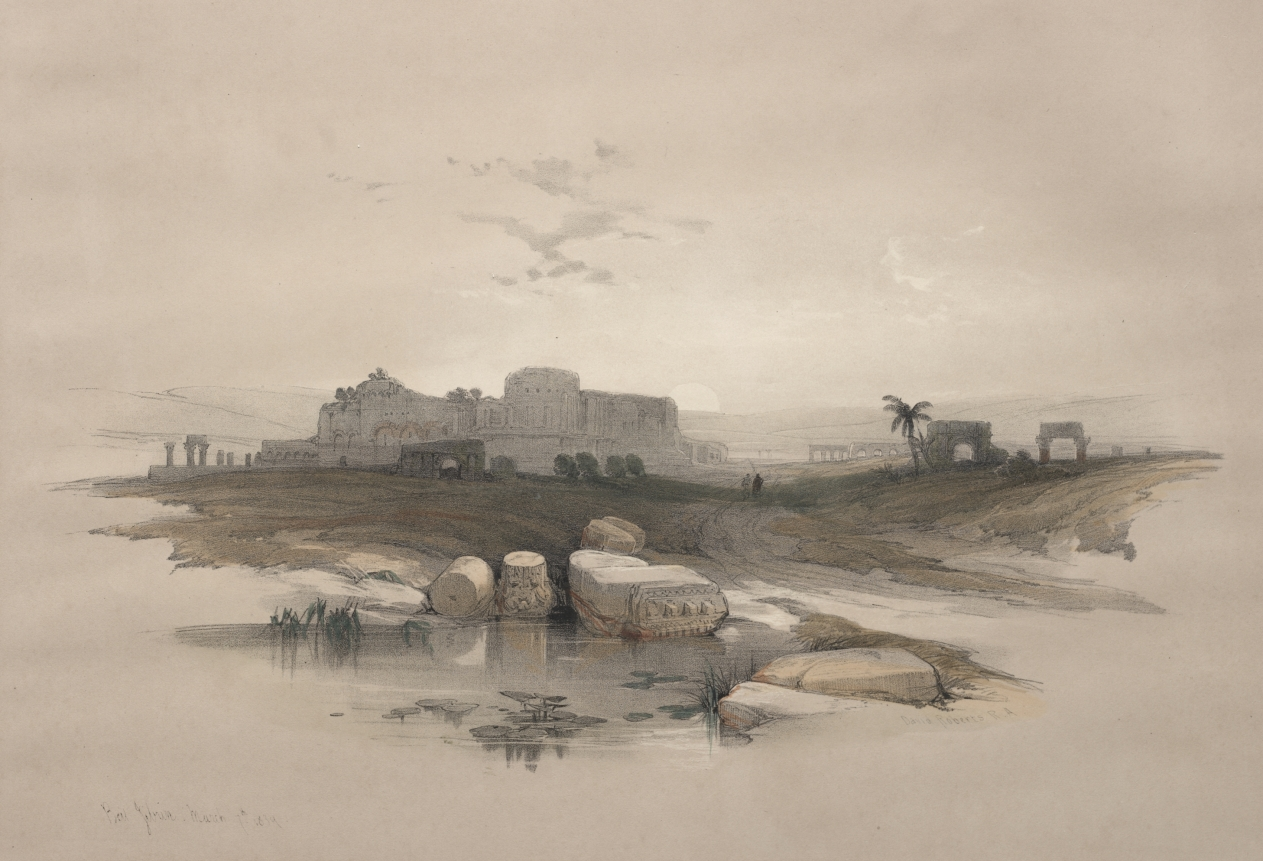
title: Eleutheropolis or the modern Beit-Jibrin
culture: England, 19th century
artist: David Roberts (Scottish, 1796–1864)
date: 1839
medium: color lithograph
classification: Print